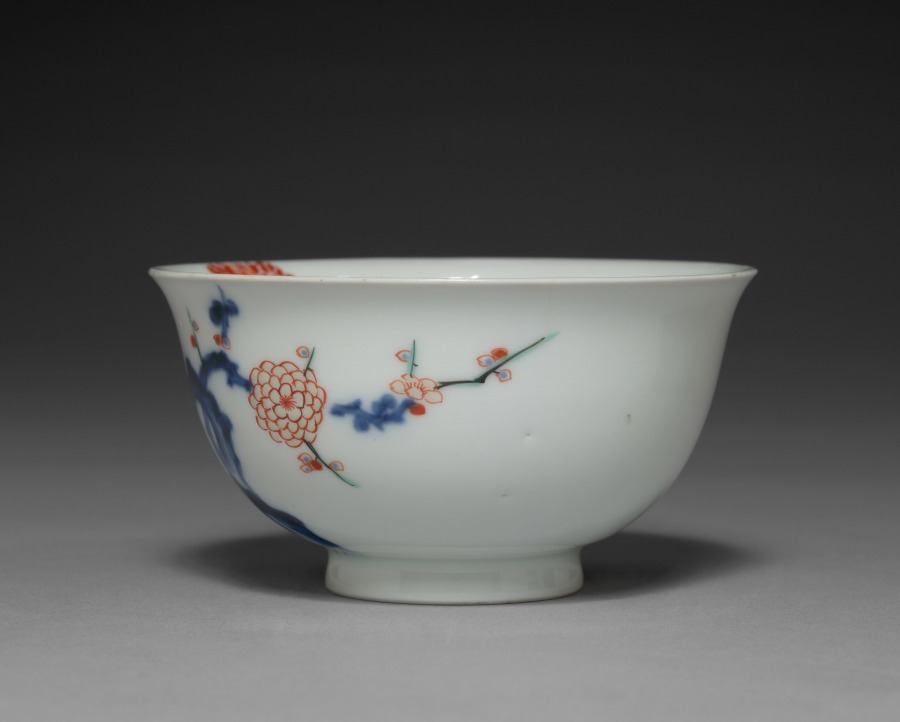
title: Cup with Plum and Rock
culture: Japan, Edo period (1615–1868)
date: 1700s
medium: porcelain with underglaze blue and overglaze enamel decoration (Hizen ware, Ko-Kutani type)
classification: Ceramic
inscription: 福